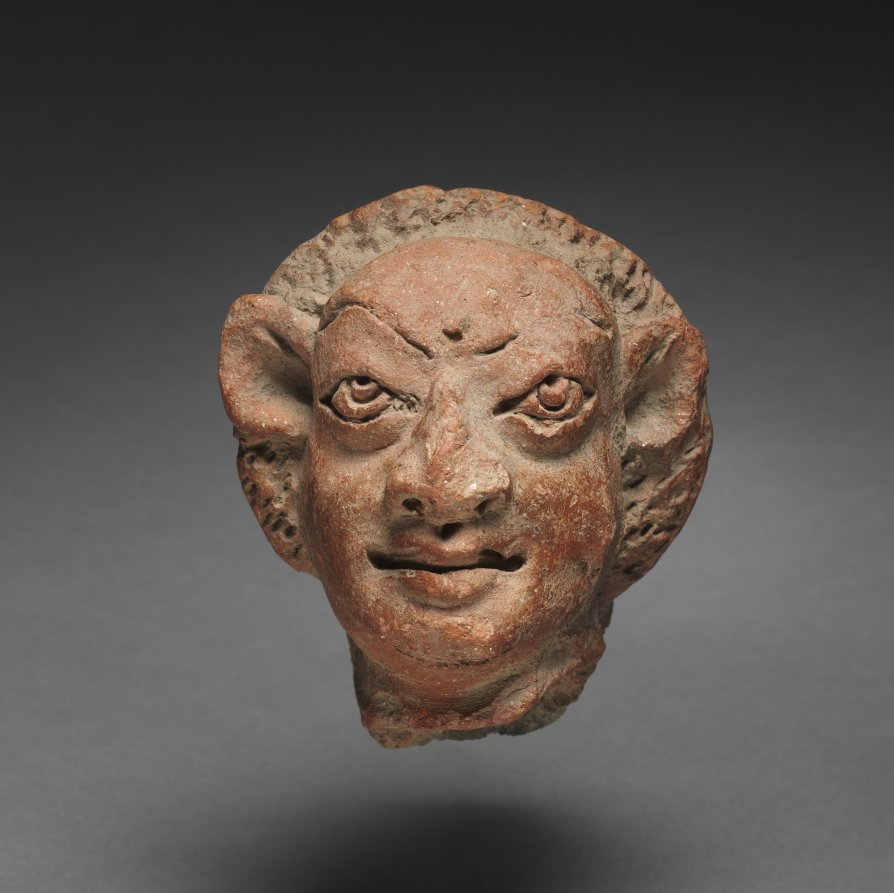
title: Grotesque Male Head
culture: India, Gupta period (320–647)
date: c. 400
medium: terracotta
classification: Sculpture